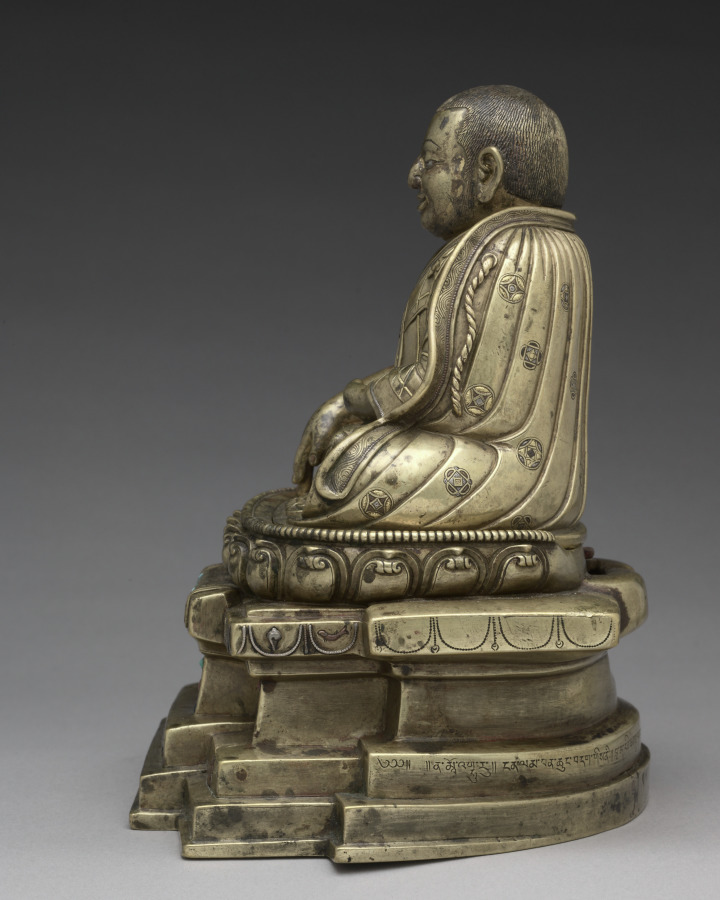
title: Portrait of Phagmo Drupa Dorje Gyalpo (1110–1170)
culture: Central Tibet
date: 1200s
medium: gilt bronze with gold, silver, copper, turquoise, lapis, and coral inlay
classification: Sculpture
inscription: / / Na mo 'ghu ru / / Ngan lam ban chung bdag gis ni / / bla ma Rin chen sku bzhengs pa yi / / bsod nams 'di yi byin brlabs kyis / / 'gro drug sdug sngal zad par shog / / Translation: "Salutations to the master ! May the sufferings of the six kinds of beings be appeased through the blessing of merit gained by me, the little monk of Ngan.lam, in having this statue of the Lama Rin.chen made."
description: This portrait statue depicts the first monastic leader of the prominent Buddhist monastery of Densatil, an influential early leader of the Tibetan Buddhist monastic order called Kagyu, famous for his views on the importance of meditation. He sits on a lotus pedestal and lion throne, like a Buddha, and his hand positions (mudras) communicate that meditation leads to enlightenment.